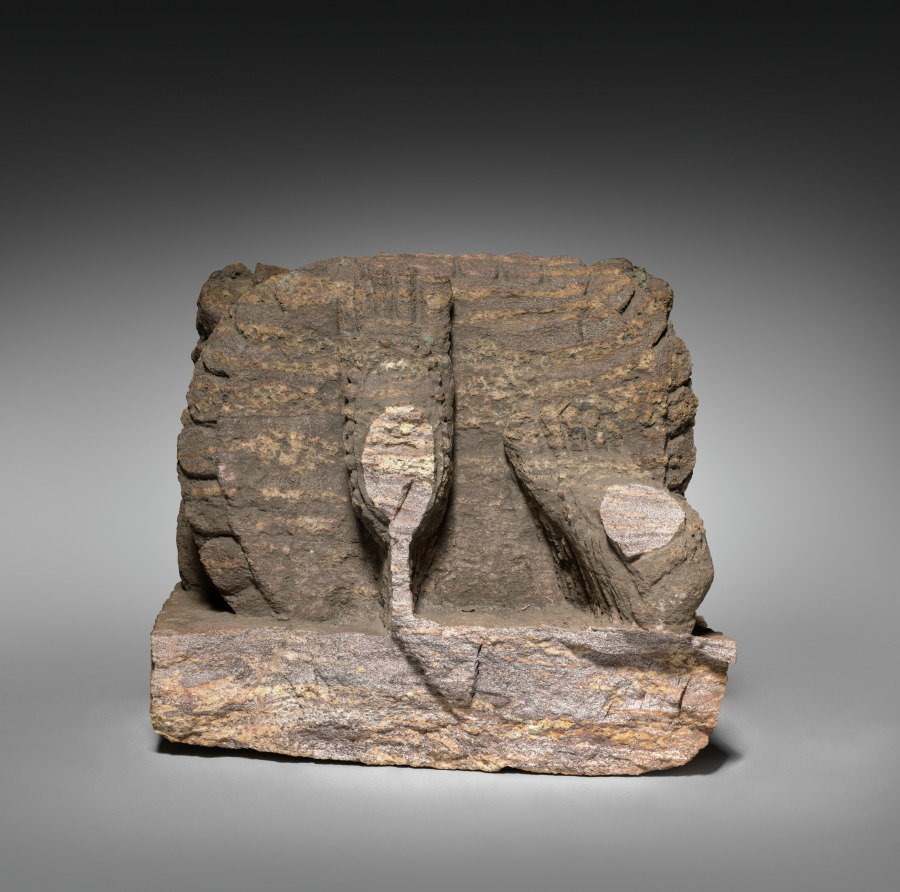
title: Base and Feet of Devata or Yakshi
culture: India, Province of Orissa, 20th century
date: 20th century fake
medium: sandstone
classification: Sculpture